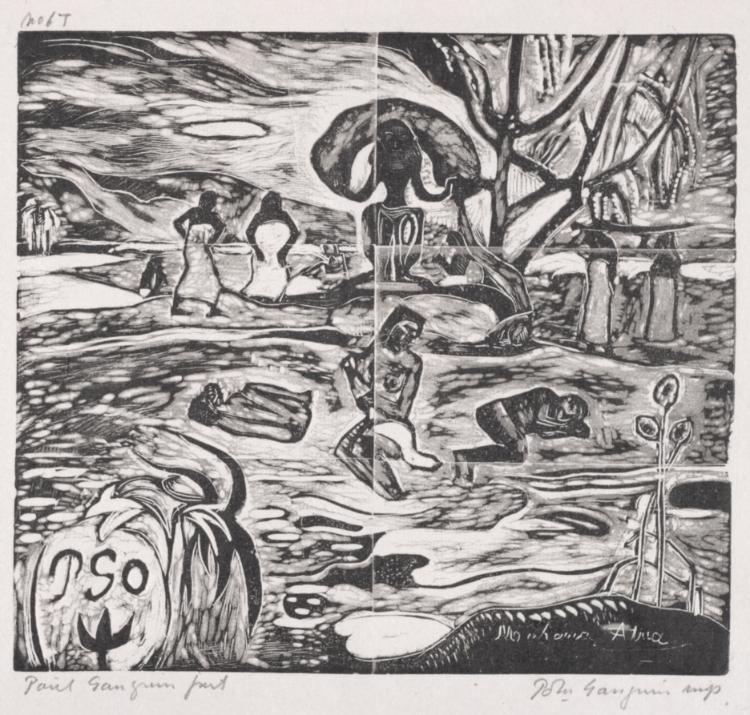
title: Tahitian Series: Offerings to a God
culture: France, 19th century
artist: Paul Gauguin (French, 1848–1903)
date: 1893–94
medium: woodcut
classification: Print